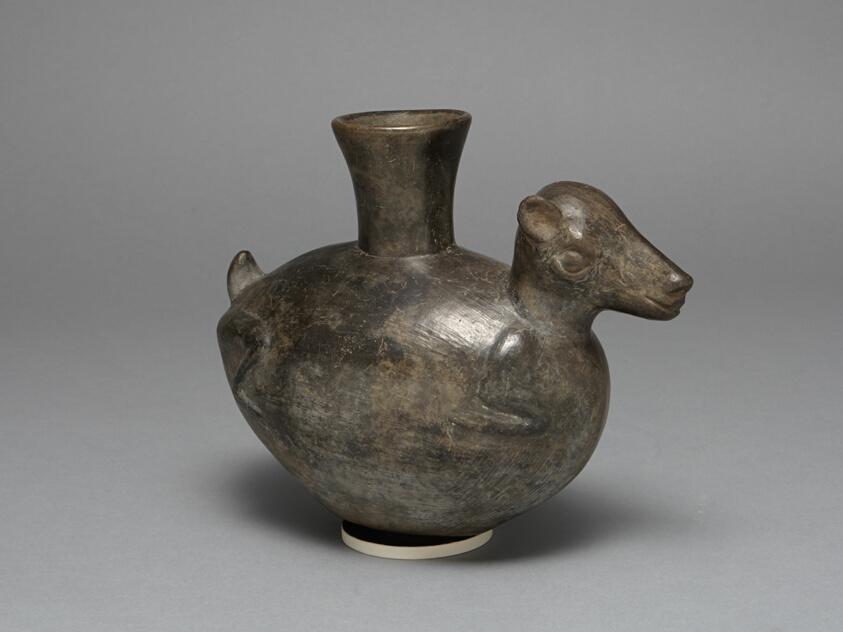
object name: Vessel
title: Blackware Jar in the Form of an Animal, Possibly a Llama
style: chimú, late intermediate period, Pre-Columbian, americas, Arts of the Americas, andean, andes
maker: Chimú (North coast, Peru)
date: 1200–1450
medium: Ceramic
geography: Peruvian North Coast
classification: blackware (black basaltes); earthenware; ceramics; vessel; art of the americas